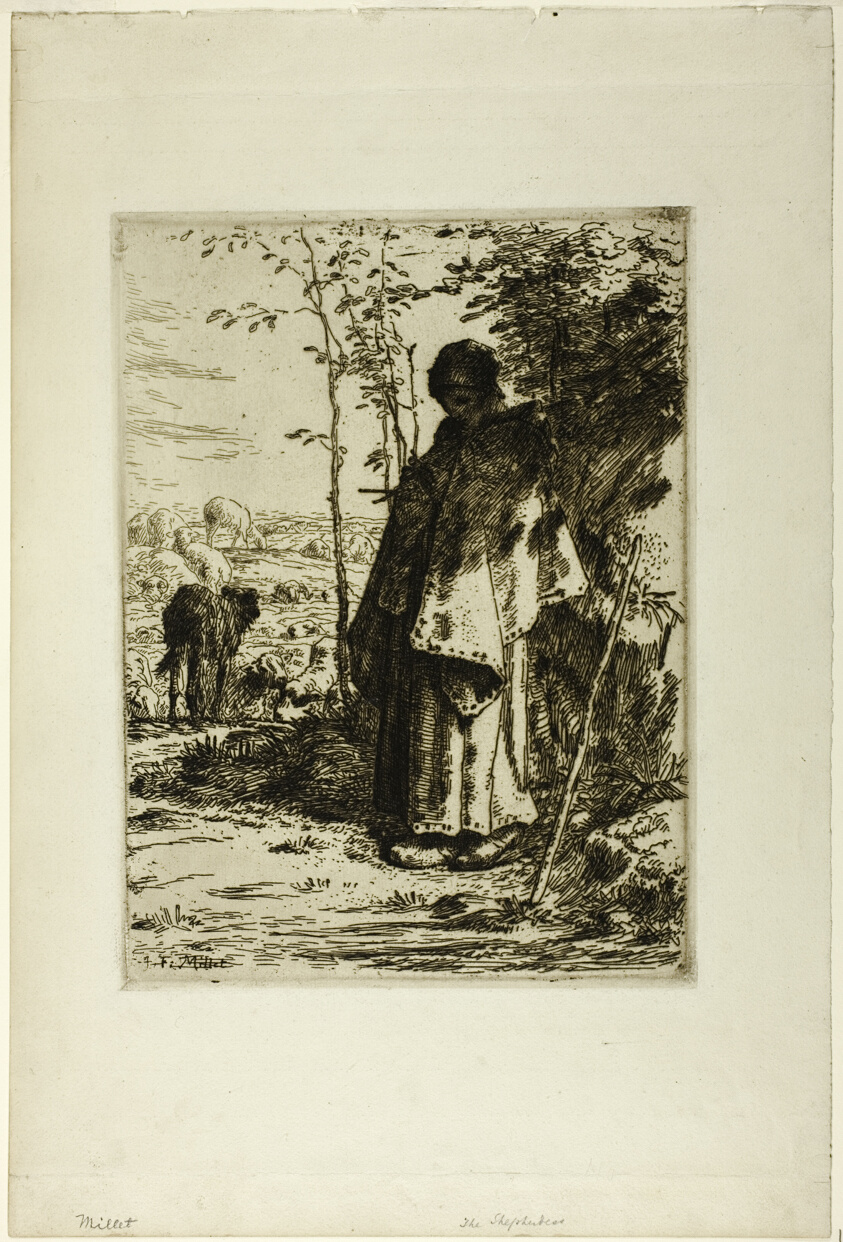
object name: Print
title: The Shepherdess Knitting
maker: Jean François Millet (French, 1814-1875)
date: 1862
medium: Etching on ivory laid paper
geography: France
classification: etching; print; prints and drawing